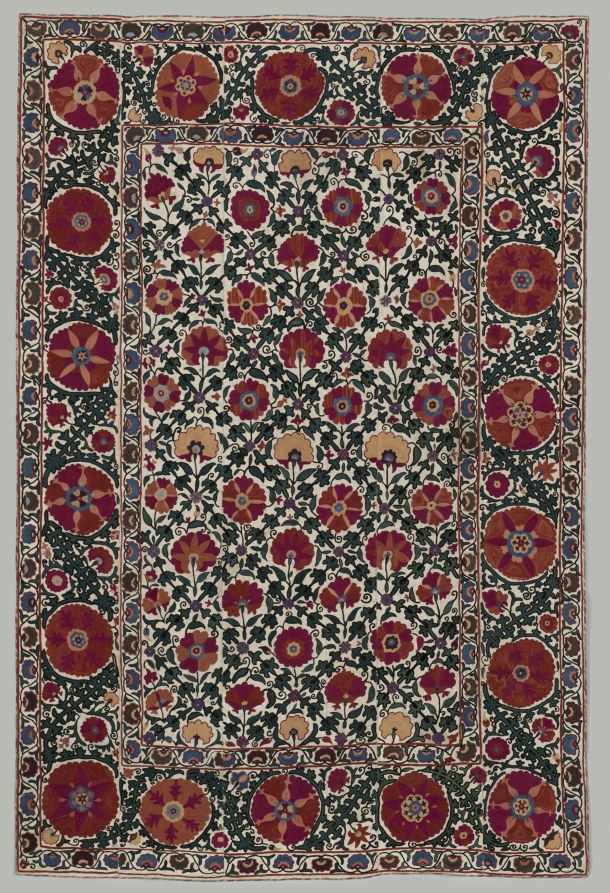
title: Wall Hanging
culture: Uzbekistan, Bukhara or Shahr-i Sabz, 19th century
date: 1850–1899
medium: Silk, cotton; plain weave, embroidery, tambour chain stitch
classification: Embroidery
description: Embroideries known as suzani, after the Persian and Tajik word for needle (suzan), feature bold floral and foliate motifs enriched with several shades of red and crimson silk thread. This example suggests a lush garden enriched with single flowering plants alternating with a bird’s-eye view of blossoms in a foliate diamond trellis. Either a skilled family member or a professional drew the pattern in black ink (still visible) on five loosely joined cotton cloths; female family members disassembled them for stitching and reassembled them upon completion. Suzanis were made in many towns, generally with distinctive artistic and technical characteristics.